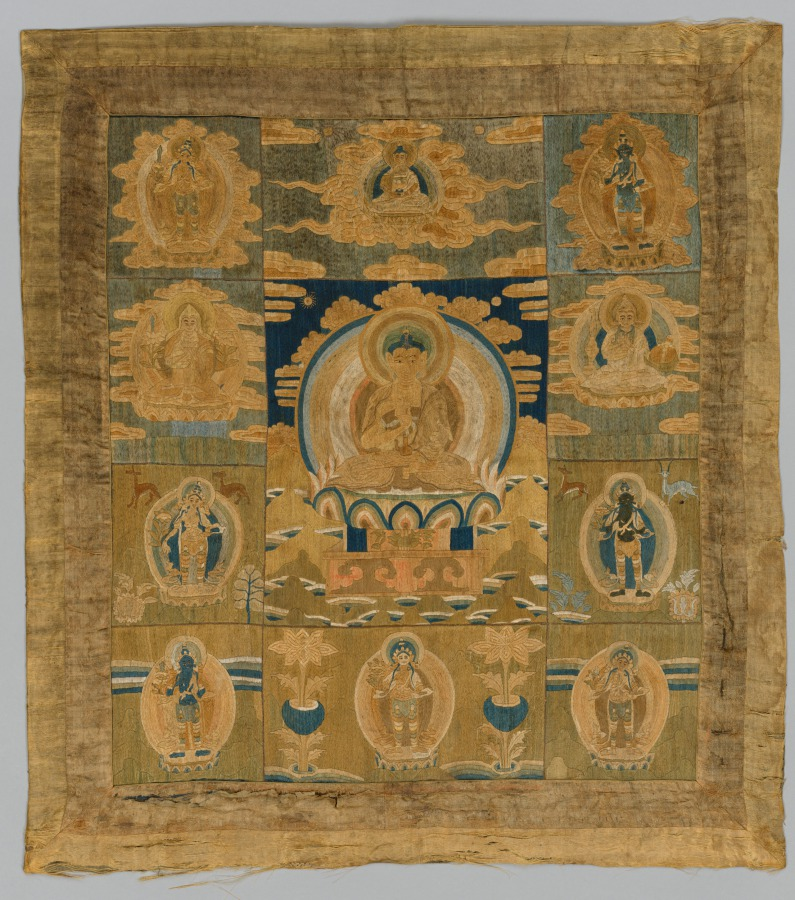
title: Mandala or Iconographic Panel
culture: Tibet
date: 1700s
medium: Silk and metallic threads: embroidery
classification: Embroidery